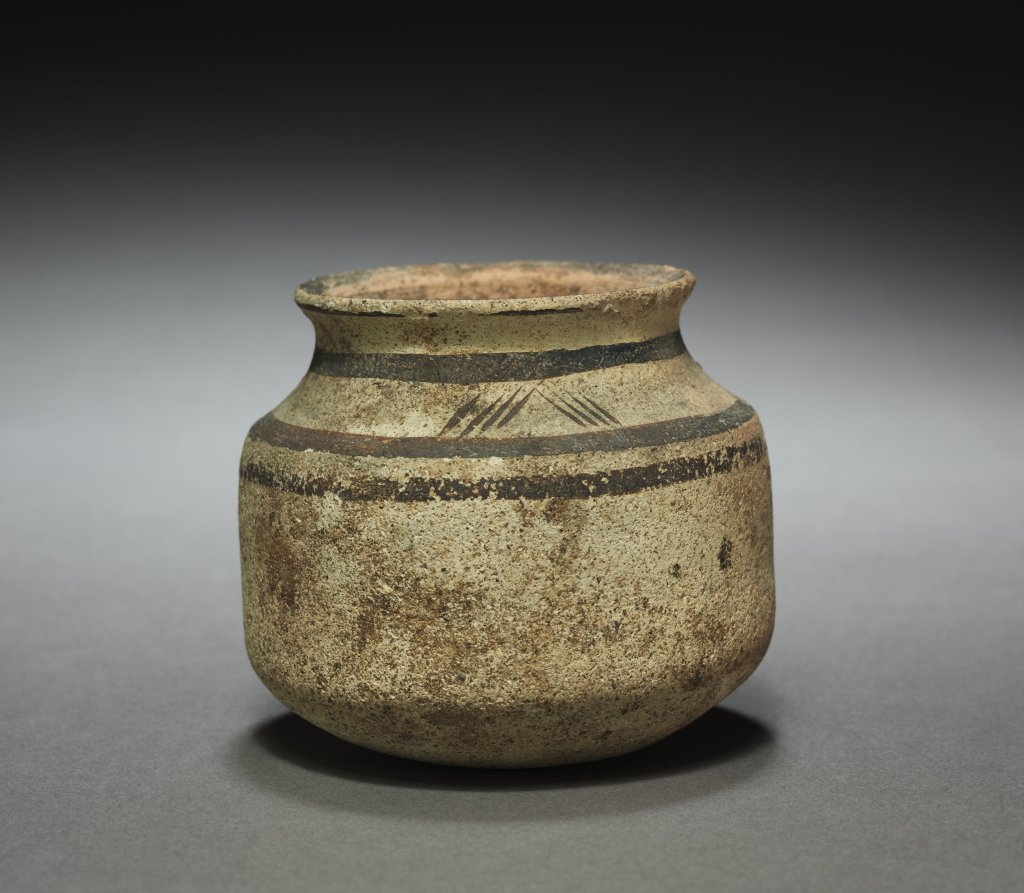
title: Pot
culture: Iran, Luristan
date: 3000–2000 BCE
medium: earthenware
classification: Ceramic